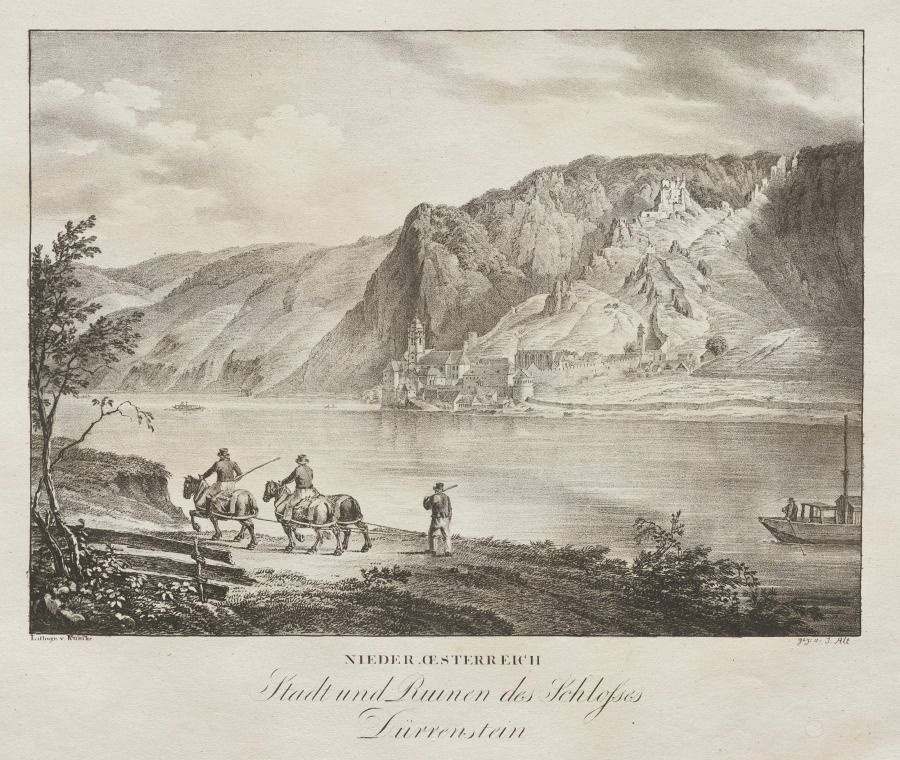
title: Nieder-oesterreich, Stadt und Ruinen des Schlosses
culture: Austria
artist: Jakob Alt (Austrian, 1789–1872)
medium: lithograph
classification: Print